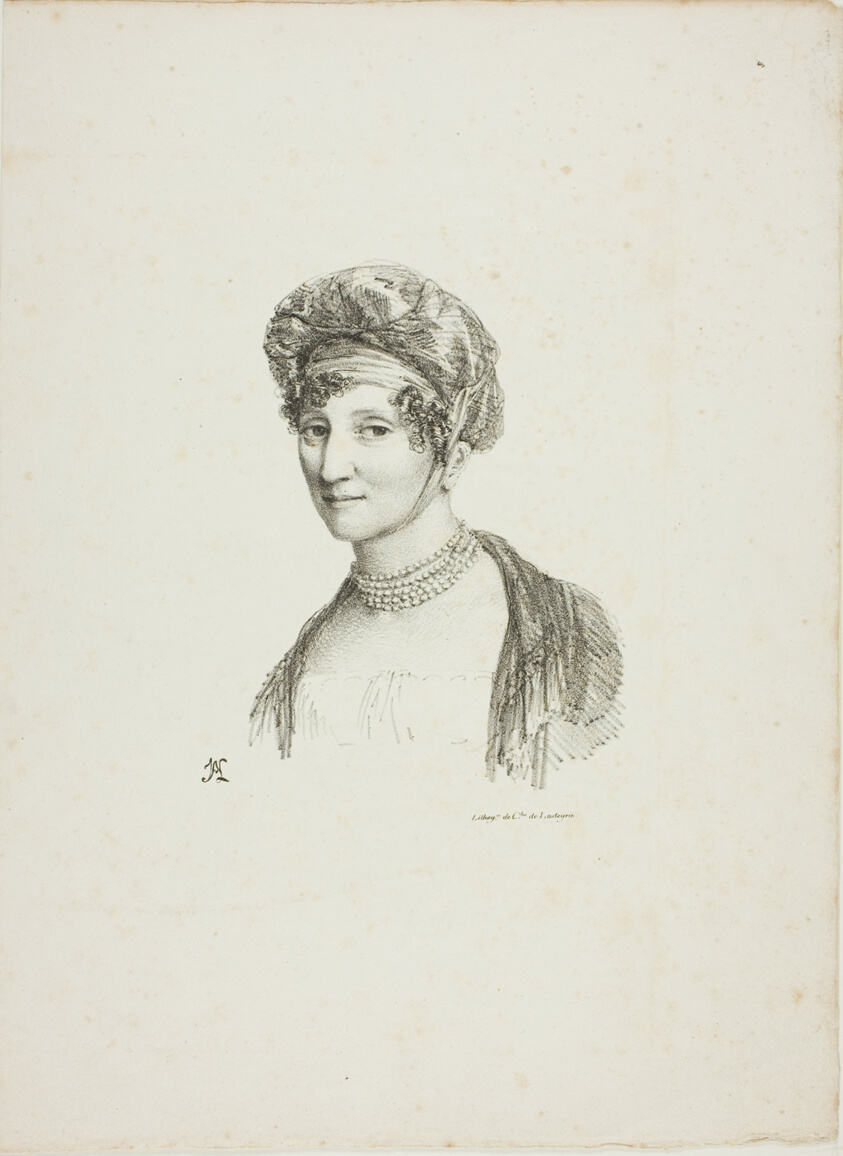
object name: Print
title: Portrait of a Woman in a Turban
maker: Jean Antoine Laurent (French, 1763-1832); printed by Comte de Charles Philibert Lasteyrie du Saillant (French, 1759-1849)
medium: Lithograph in black on ivory wove paper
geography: France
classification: lithograph; print; prints and drawing